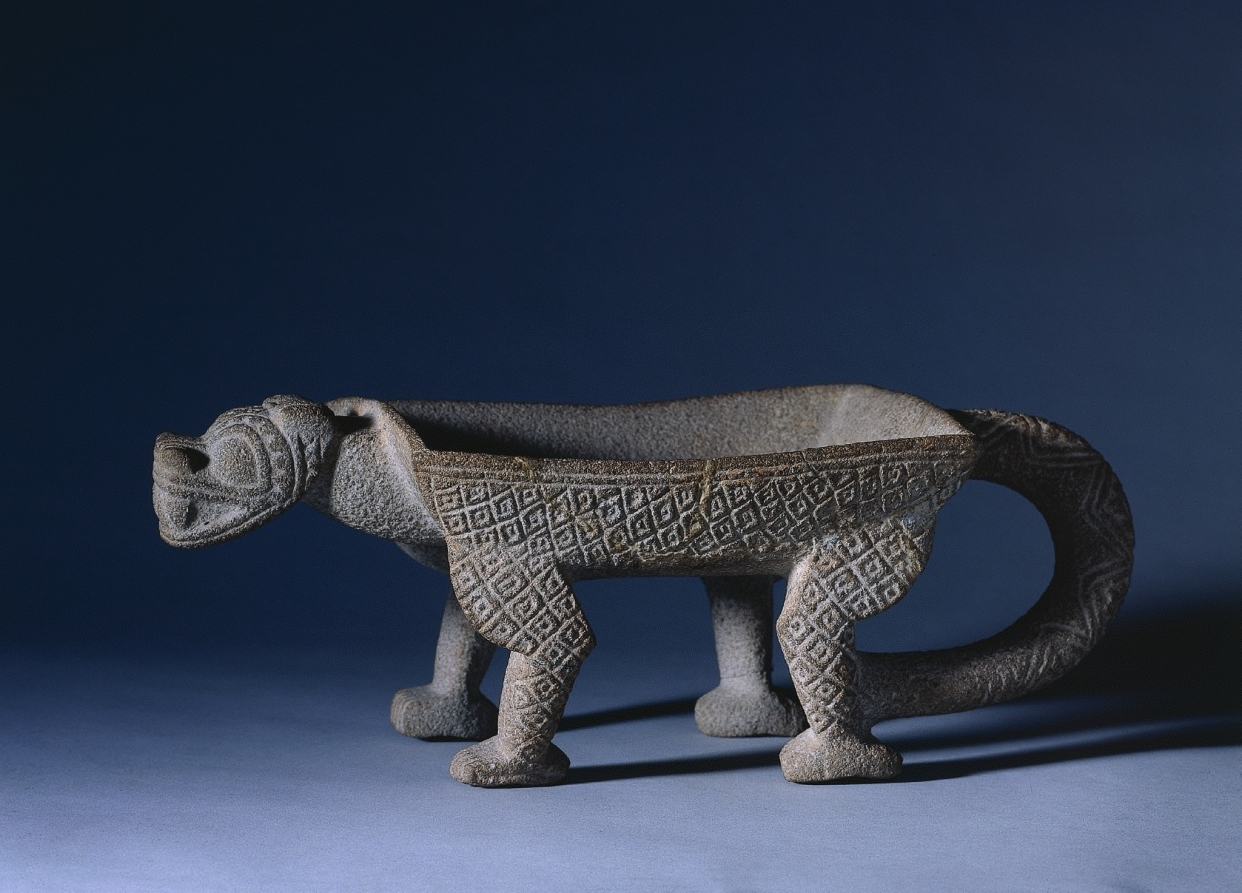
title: Jaguar Grinding Stone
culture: Costa Rica, Atlantic Watershed region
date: c. 1000–1550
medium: stone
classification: Sculpture